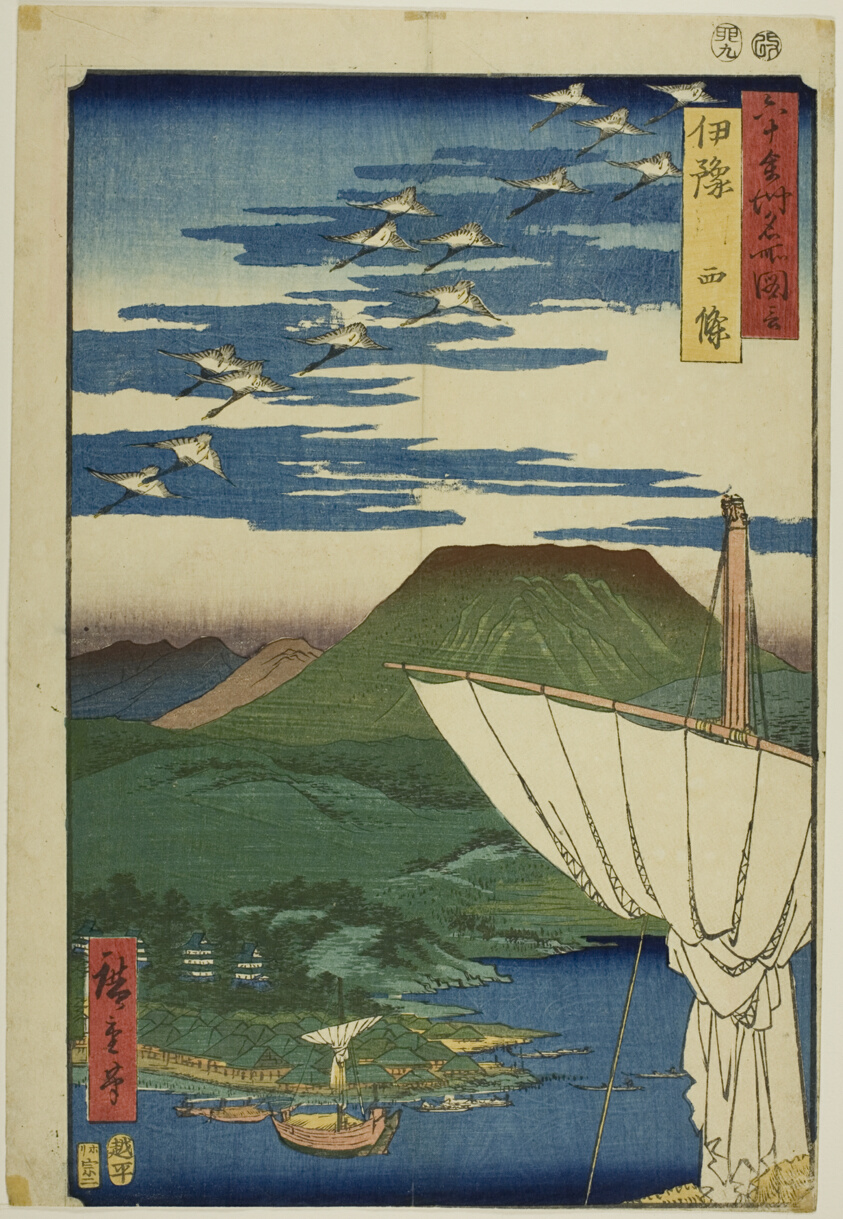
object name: Print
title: Iyo Province: Saijo (Iyo, Saijo), from the series "Famous Places in the Sixty Provinces (Rokujuyoshu meisho zue)"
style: Japanese (culture or style)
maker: Utagawa Hiroshige 歌川 広重; Japanese, 1797–1858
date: 1855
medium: Color woodblock print; oban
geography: Japan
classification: woodblock print; print